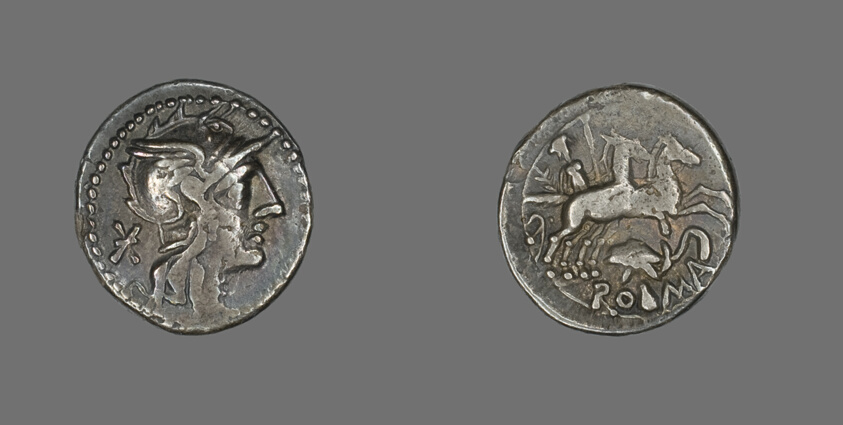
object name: Coin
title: Denarius (Coin) Depicting the Goddess Roma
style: roman (ancient, style or period), ancient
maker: Roman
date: about 99 BCE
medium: Silver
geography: Roman Empire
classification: coin; ancient art